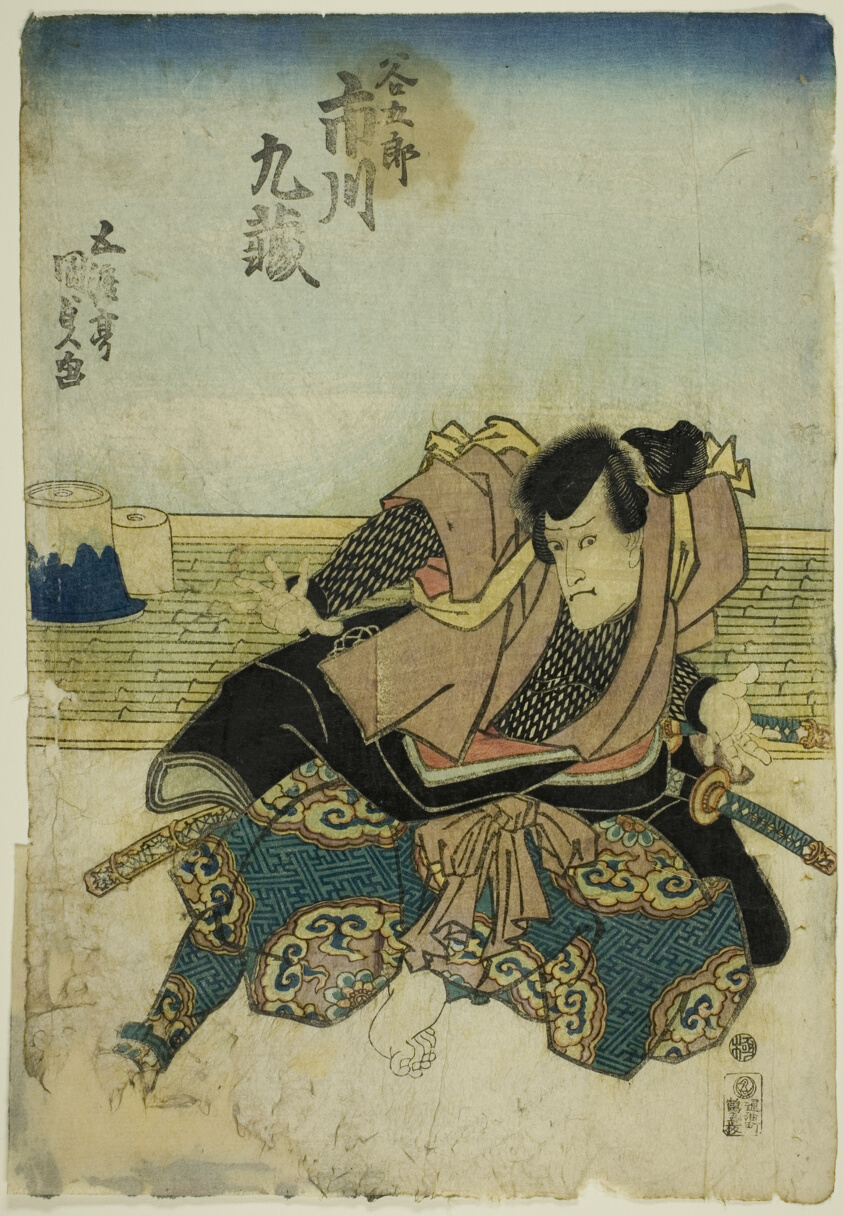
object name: Print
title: The actor Ichikawa Kuzo II as Tanigoro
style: Japanese (culture or style)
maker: Utagawa Kunisada II (Kunimasa III, Toyokuni IV) (Japanese, 1786-1864)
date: c. 1842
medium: Color woodblock print; oban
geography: Japan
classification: woodblock print; print; asian art